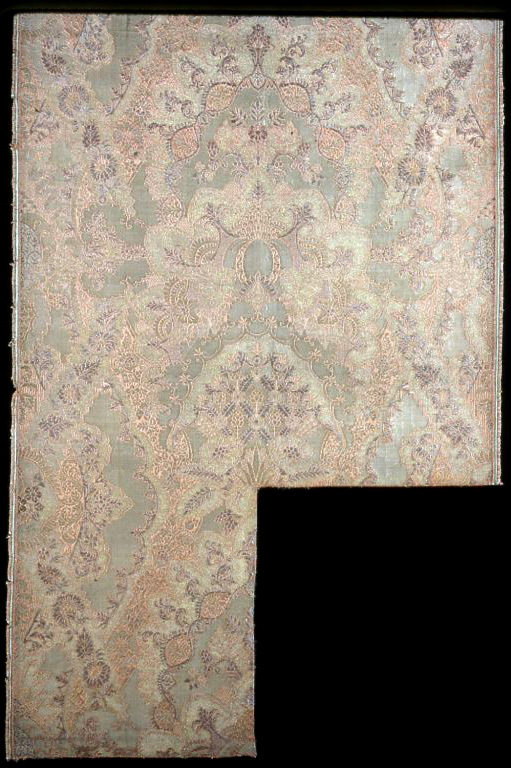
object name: Textile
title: Panel (Showing 'Lace' Design)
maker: France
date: 1724/26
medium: Silk, gilt-and-silvered-metal-strip-wrapped silk, warp-float faced 4:1 satin weave with supplementary patterning and supplementary brocading wefts tied by supplementary binding warps in twill interlacings; one full and one partial selvage present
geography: France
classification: textile; weaving